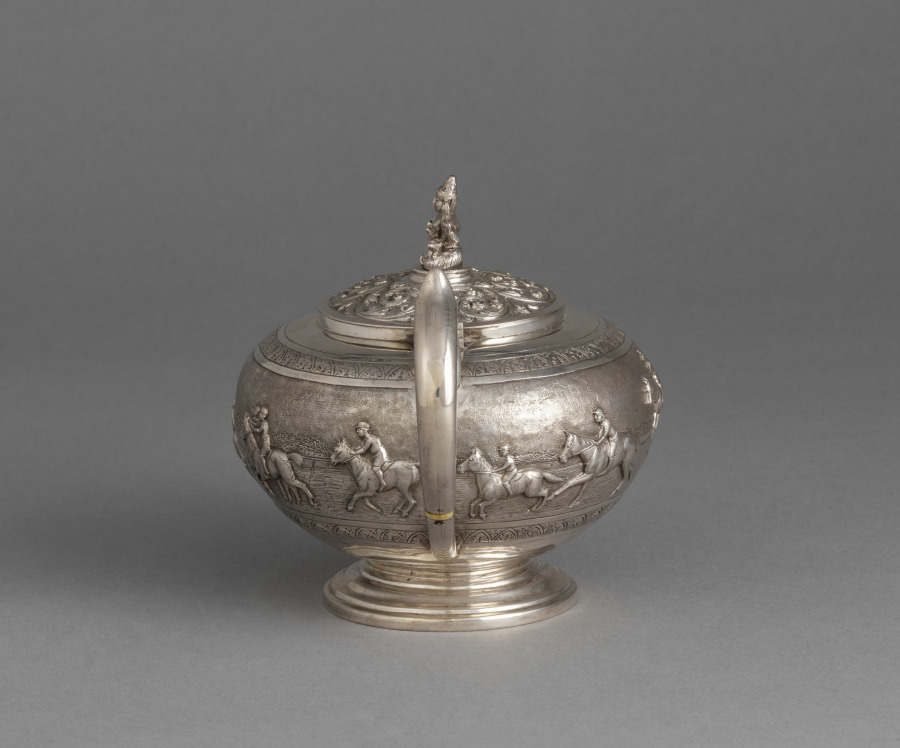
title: Teapot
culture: India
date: c. 1860–90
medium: silver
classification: Silver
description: Made either for export or to appeal to the British community living in colonial splendor in India, this pot is a rare testament to the influence of the British Empire on consumer design during the period. Shri Lakshmi, the Hindu goddess of wealth, crowns the vessel as an apt divinity to preside over the horse races depicted on the belly of the teapot.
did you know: The Hindu goddess of wealth on the lid has four arms, two of which hold lotus flowers.